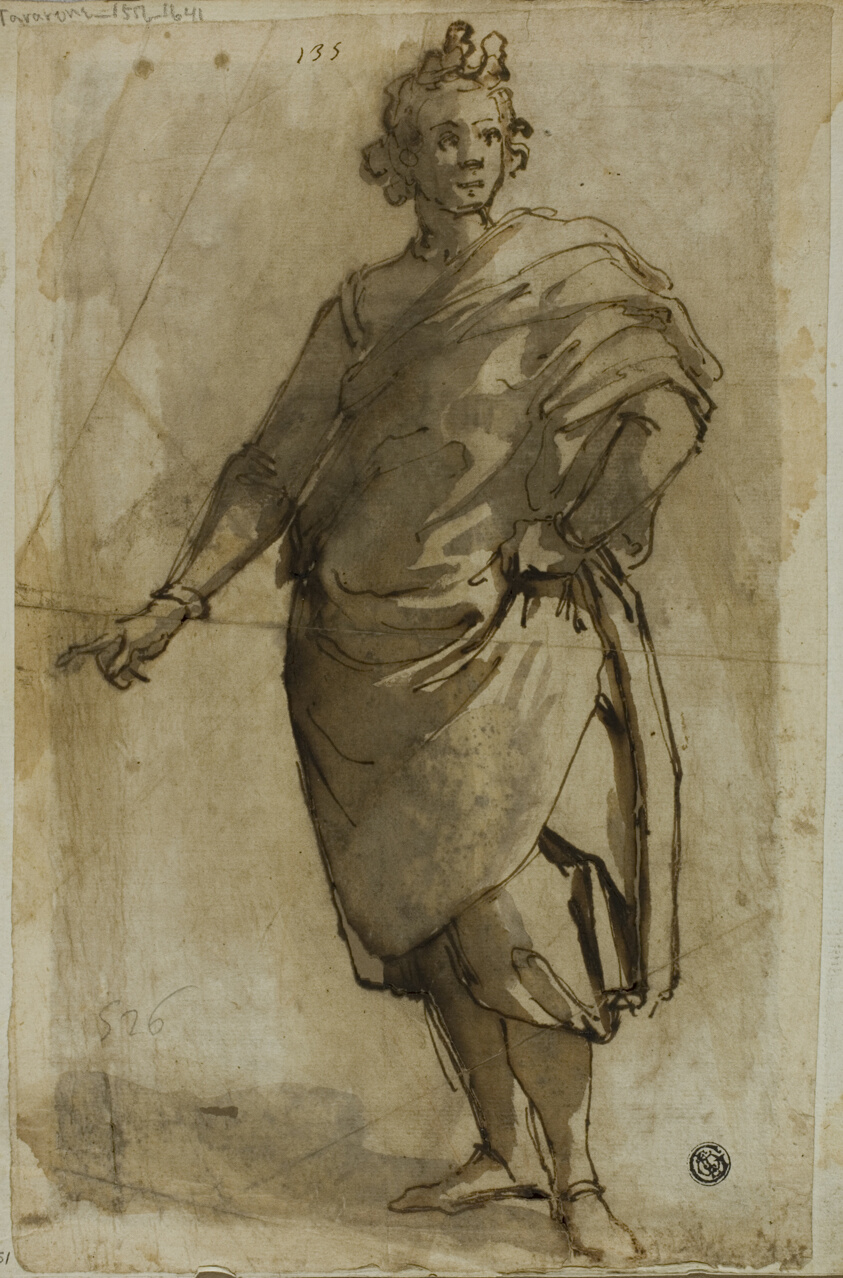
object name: Drawing and Watercolor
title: Standing Male Figure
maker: Jacopo Chimenti, called Jacopo da Empoli; Italian, 1551-1640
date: c. 1600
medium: Pen and iron gall ink, with brush and brown and gray wash, on ivory laid paper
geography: Italy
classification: pen and ink drawings; drawings (visual works); prints and drawing